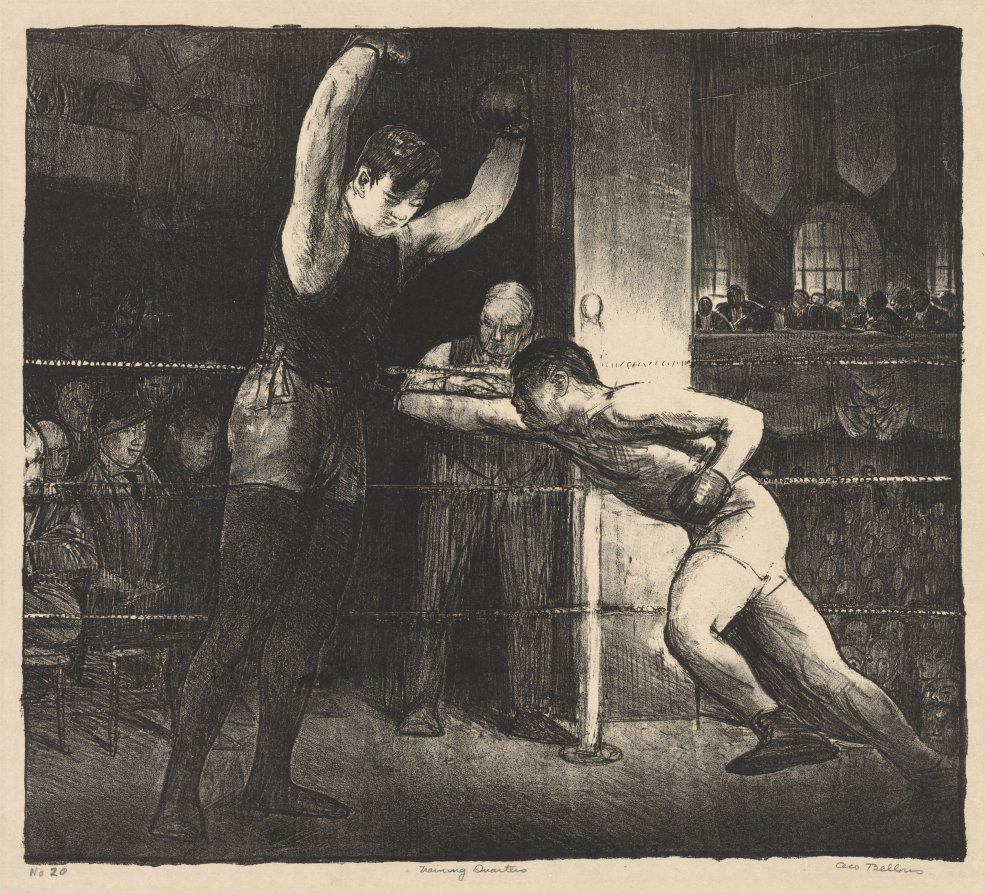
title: Training Quarters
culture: America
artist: George Bellows (American, 1882–1925)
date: 1916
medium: lithograph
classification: Print